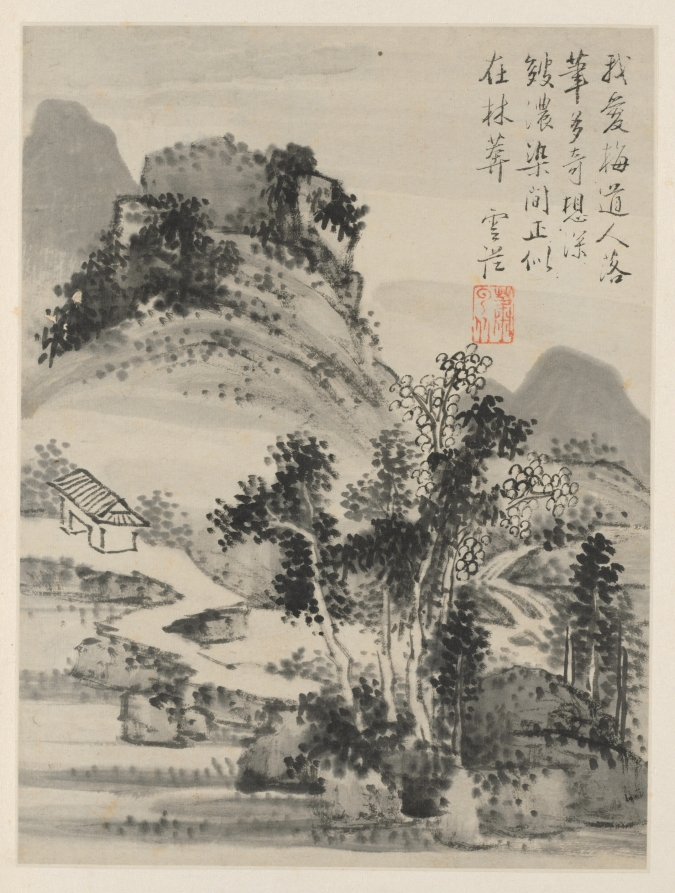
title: Album of Seasonal Landscapes, Leaf D (previous leaf 2)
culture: China, Qing dynasty (1644-1911)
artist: Xiao Yuncong (Chinese, 1596–1673)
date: 1668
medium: album leaf; ink and light color on paper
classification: Painting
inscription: 我愛梅道人，落筆多奇想。 深皴濃染間，正似在林莽。 雲從 [印]蕭雲從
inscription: 9 additional seals: 2 of Chen Yixi 陳奕禧 (1646-1709); 4 of Li Yufen 李玉棻 [Li Yunhu 李韵湖] (active mid-1800s); 3 unidentified.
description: Throughout his lifetime, Xiao Yuncong visited Nanjing and Yangzhou, cities embedded in the fertile and water-rich Jiangnan region, as reflected in his paintings. Xiao painted from nature, and his landscapes are informed by the seasons and his travels, as well as by his experience as a print designer. Xiao’s fresh, light colors continue to appear in later Shanghai school paintings. This album was formerly in the collection of Li Yufen in Yangzhou and then owned by Wu Hufan in Shanghai. While the artist impressed his seal consistently below his poetic inscriptions in the upper parts of the composition, the red seals on the margins and in the lower corners of the paintings are impressions by the album’s previous owners.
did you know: Xiao Yuncong evoked dark, stormy summer weather with rich tones of ink.